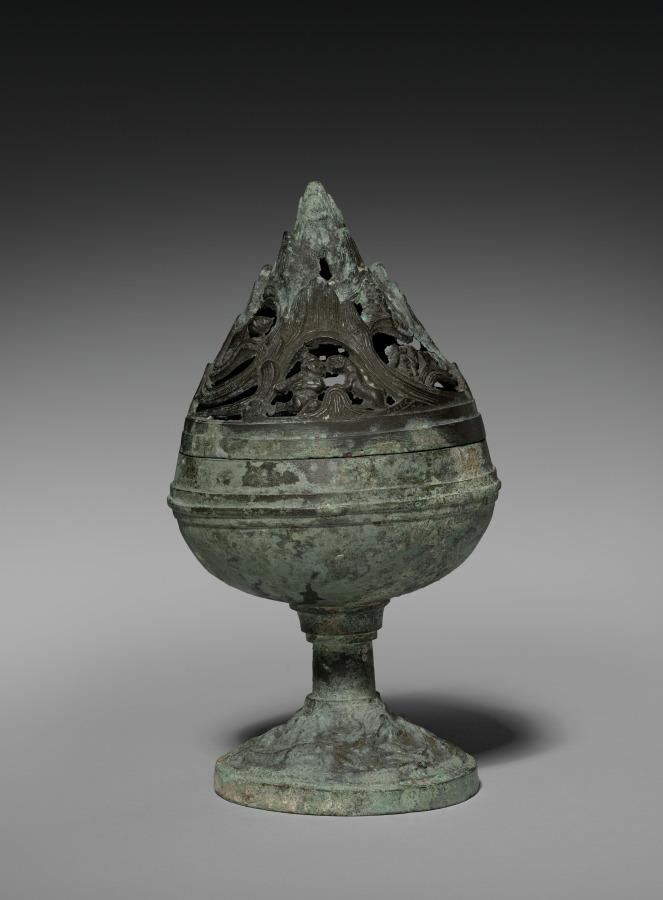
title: Incense Burner (Boshan Lu)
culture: China, Western Han dynasty (206 BCE–8 CE)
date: 200–100 BCE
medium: bronze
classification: Metalwork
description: The conical cover of this incense burner represents a miniature mountain with hunting scenes. The cover was shrouded in mist and emanated intoxicating smoke through its openwork when fragrant woods and herbs were burnt in its stem cup, transporting its beholder into an imaginative realm.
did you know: Deities (appearing as hunters) and fantastic beasts roam freely among mists and clouds on this incense burner.